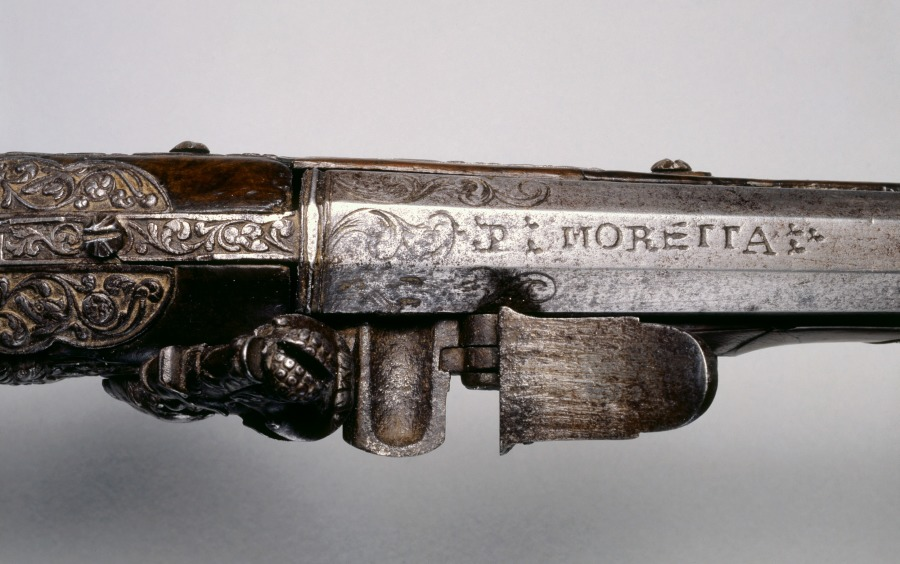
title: Pair of Flintlock Pistols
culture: Italy, Brescia, 17th century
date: c. 1670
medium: steel, chiseled decoration with walnut stock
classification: Arms and Armor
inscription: P. Moretta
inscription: CARLO LERME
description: The chiseling of gun ornament is a task comparable to sculpture on a miniature scale, carried out in an extremely hard material. Since this was usually beyond the skill of most gunsmiths, it was not uncommon for such work to be contracted out as occurred here. While the barrels are signed P. Moretta, the lock plates of these pistols are signed Carlo Lerme, who also chiseled the mounts.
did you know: This type of pistol fired only once before needing to be reloaded, so they were often produced in matched pairs. Even the trigger is decorated on these beautifully ornate weapons. Look closely to compare how a skilled craftsman carefully matched the patterning on these two guns.